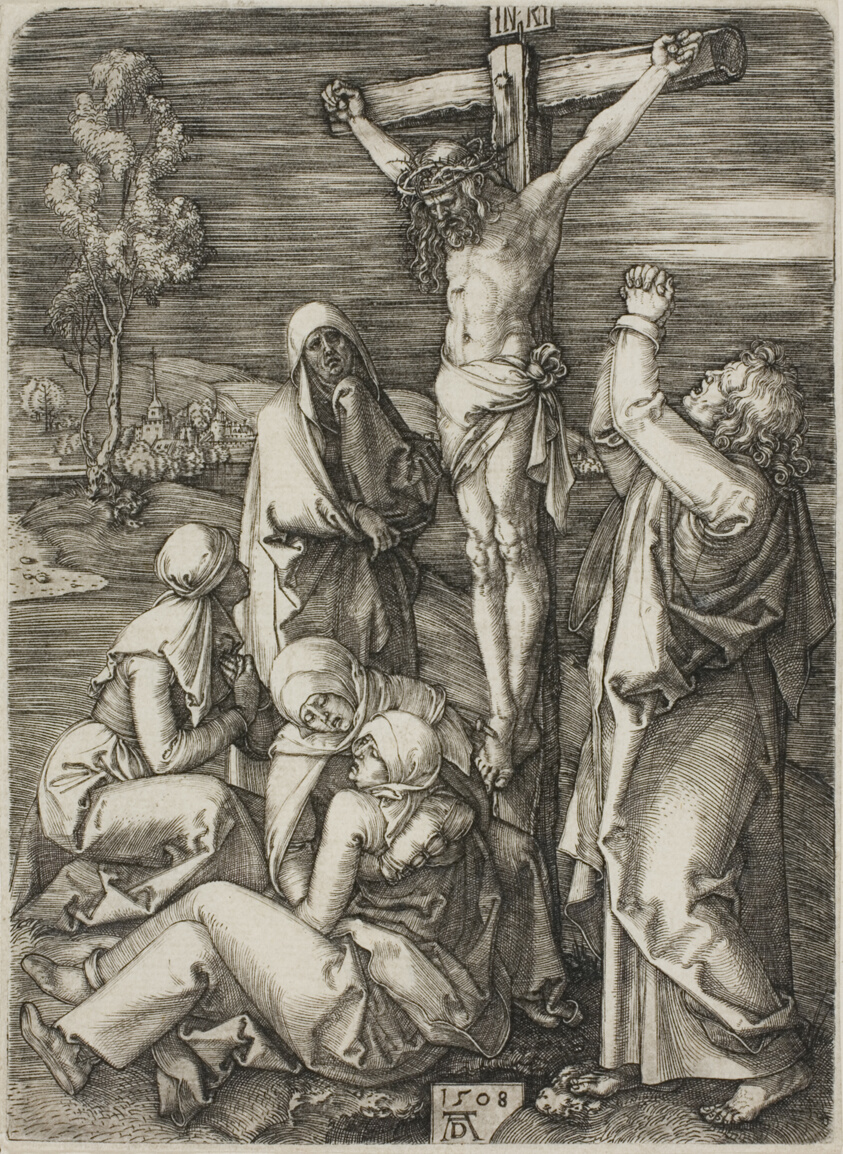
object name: Print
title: Crucifixion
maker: Albrecht Dürer (German, 1471-1528)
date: 1508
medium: Engraving in black on ivory laid paper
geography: Germany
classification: engraving; print; prints and drawing; paper